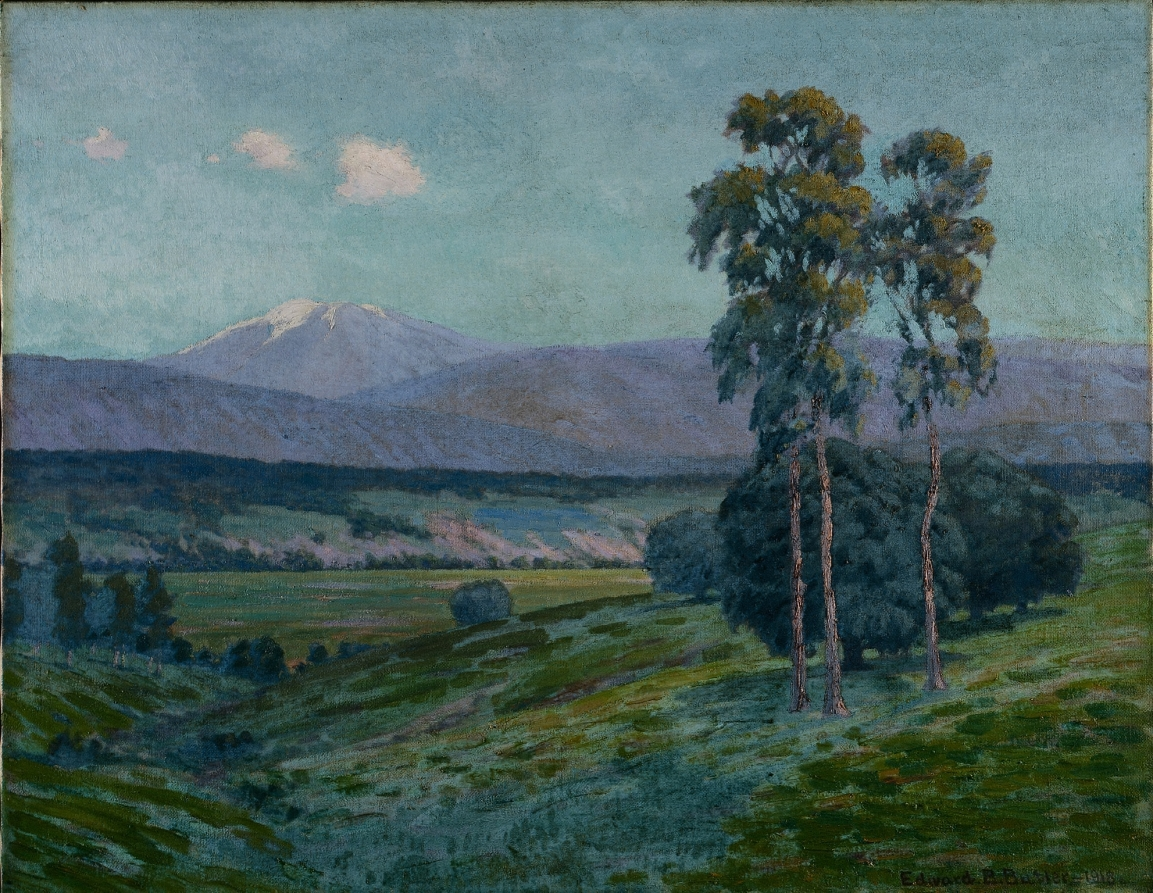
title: Early Spring, California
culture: America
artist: Edward B. Butler (American, 1853–1928)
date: 1918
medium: oil on canvas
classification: Painting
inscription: Signed lower right: Edward B. Butler - -1918